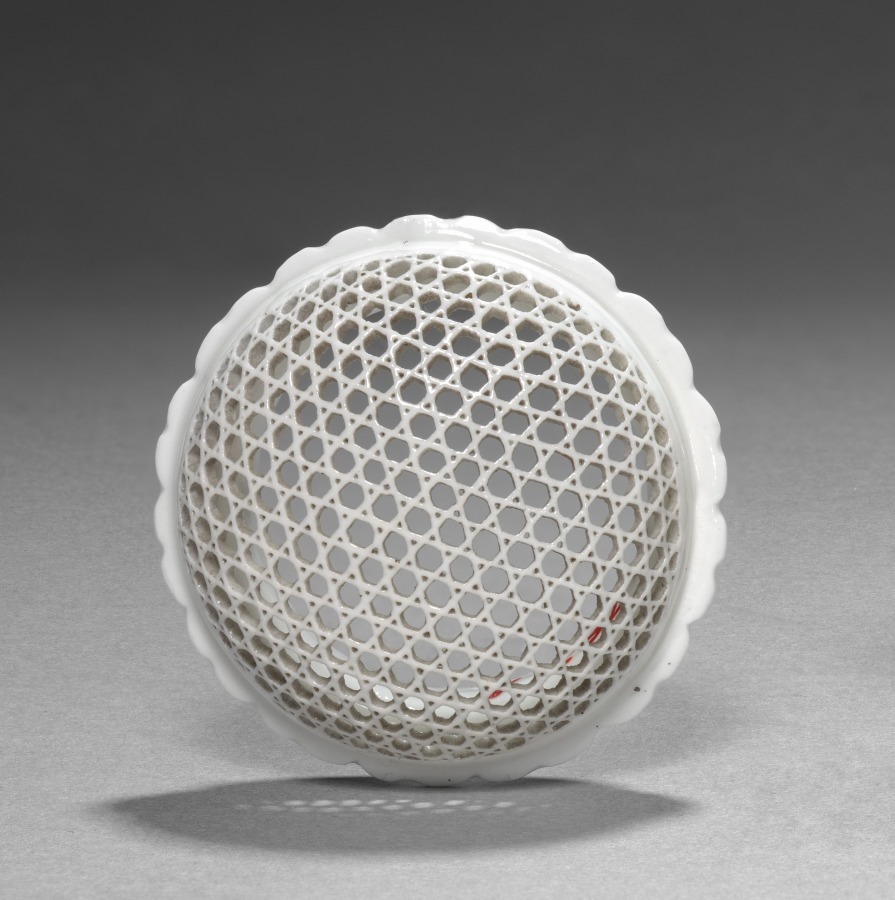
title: Incense Chalice and Cover (lid)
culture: Japan, Edo period (1615–1868)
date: 1700s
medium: porcelain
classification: Ceramic